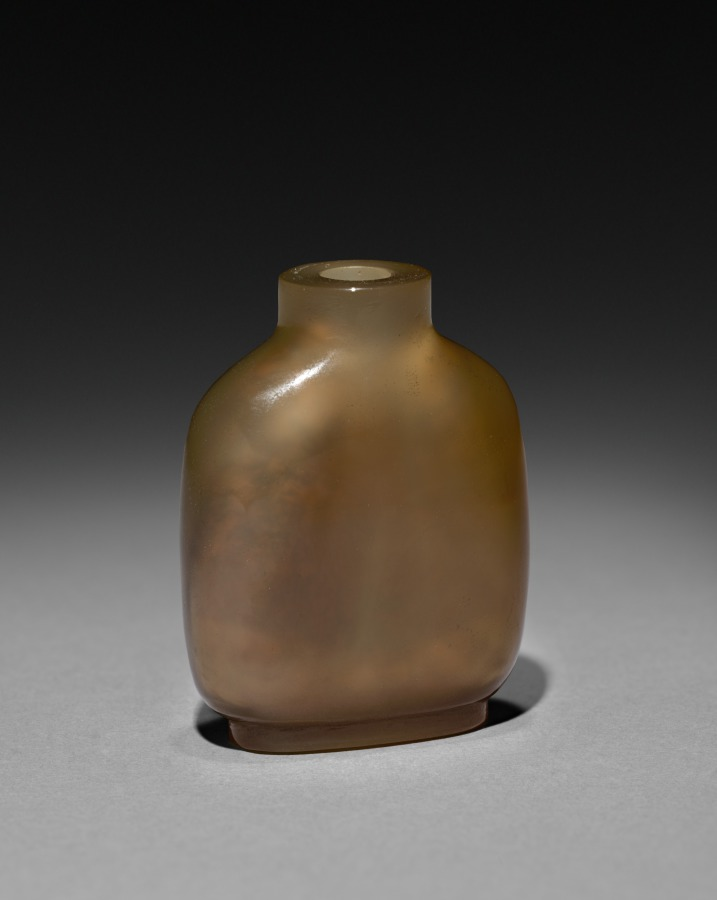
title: Snuff Bottle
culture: China, Qing dynasty (1644-1911)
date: 1644–1911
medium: glass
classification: Glass